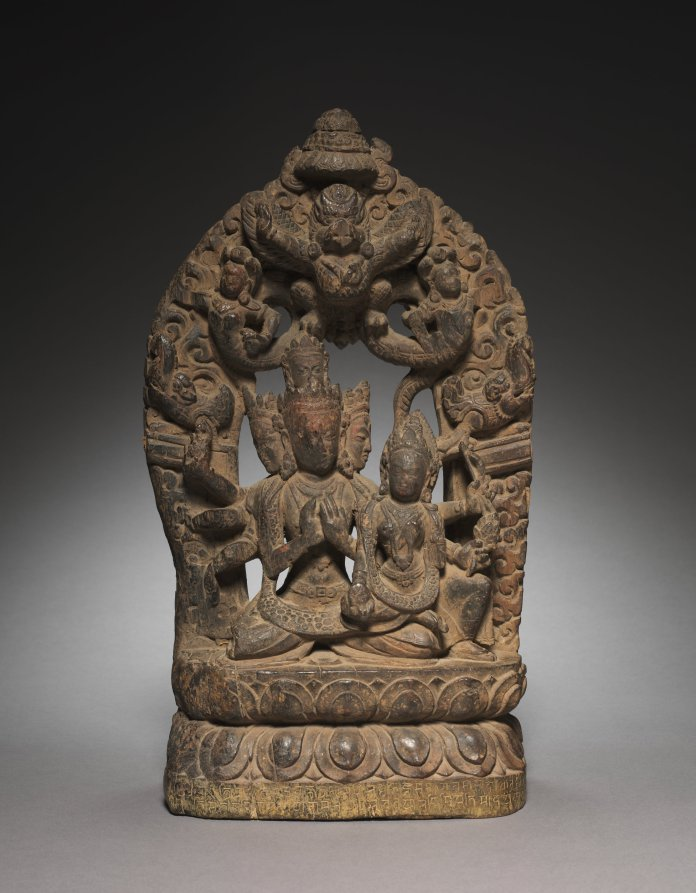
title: Tantric Form of Avalokiteshvara with Consort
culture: Nepal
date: 1500s–1600s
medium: wood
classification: Sculpture